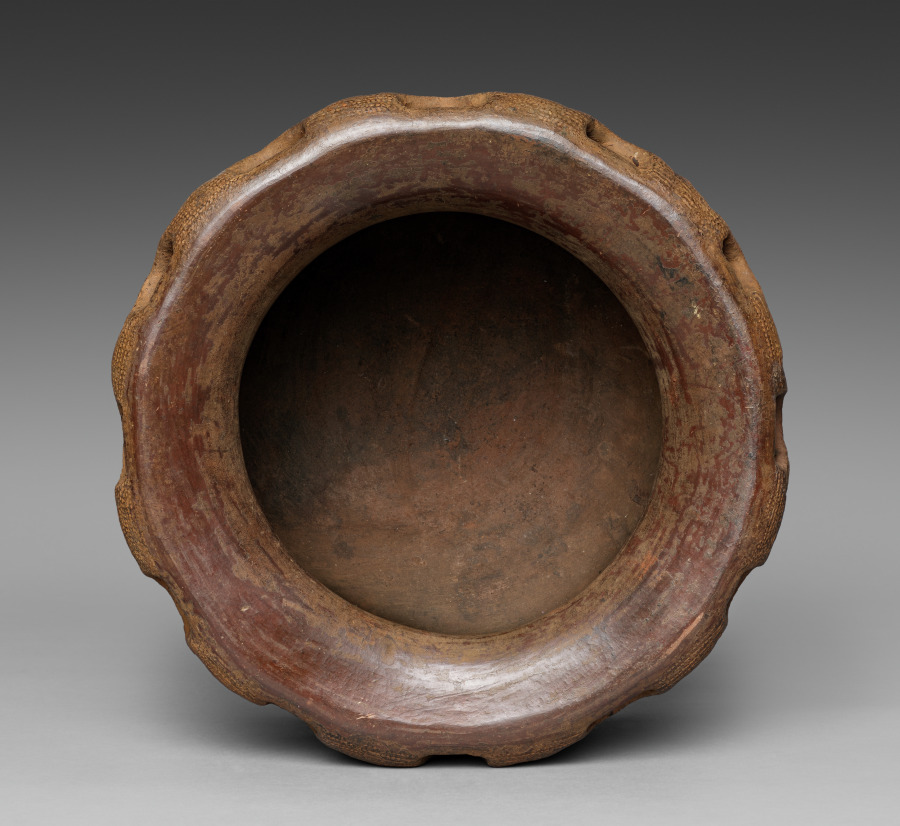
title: Palm Wine Vessel (kuh mendu)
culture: Probably Babessi or Bamessing, Cameroon, Cameroon Grassfields-style pottery, unknown female ceramicist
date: 1900s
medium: Terracotta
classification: Vessels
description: Made by a female potter nearly a century ago, this palm wine vessel represents past and present cultural practices in the Cameroon Grassfields (northwest and western Cameroon). Women in the pottery-producing centers of Babessi and Bamessing hand-built these vessels. Their process alludes to pregnancy, labor, and delivery. Passing knowledge from mother to daughter since at least the 1700s, making pottery is a female economic, social, and artistic contribution. Yet many motifs refer to royal or male power, such as the lizards on this vessel. Elegant palm wine vessels like this were appropriate for ritual and hospitality in Cameroon Grassfields royal courts.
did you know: Serving and sharing palm wine in decorated vessels like this is part of a larger food culture in the Cameroon Grassfields kingdoms that centers on ritual, hospitality, status, and diplomacy.